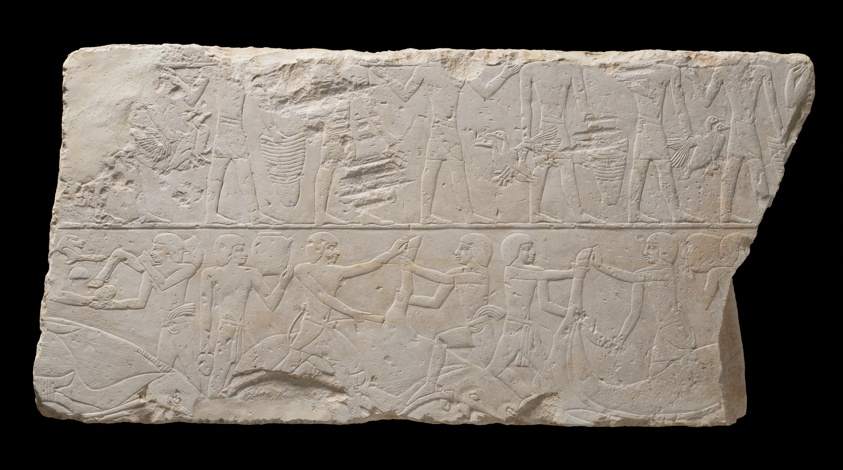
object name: Architectural fragment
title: Tomb Wall Fragment Depicting Offering Bearers and Butchers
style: old kingdom, ancient, egyptian, fifth dynasty, sixth dynasty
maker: Egyptian; Saqqara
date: Old Kingdom, mid–Dynasty 5–early Dynasty 6 (about 2445–2287 BCE)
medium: Limestone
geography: Egypt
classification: architectural fragment; stone; sculpture; ancient art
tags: funerary art, beef, birds, knives, men, offering, oxen, work